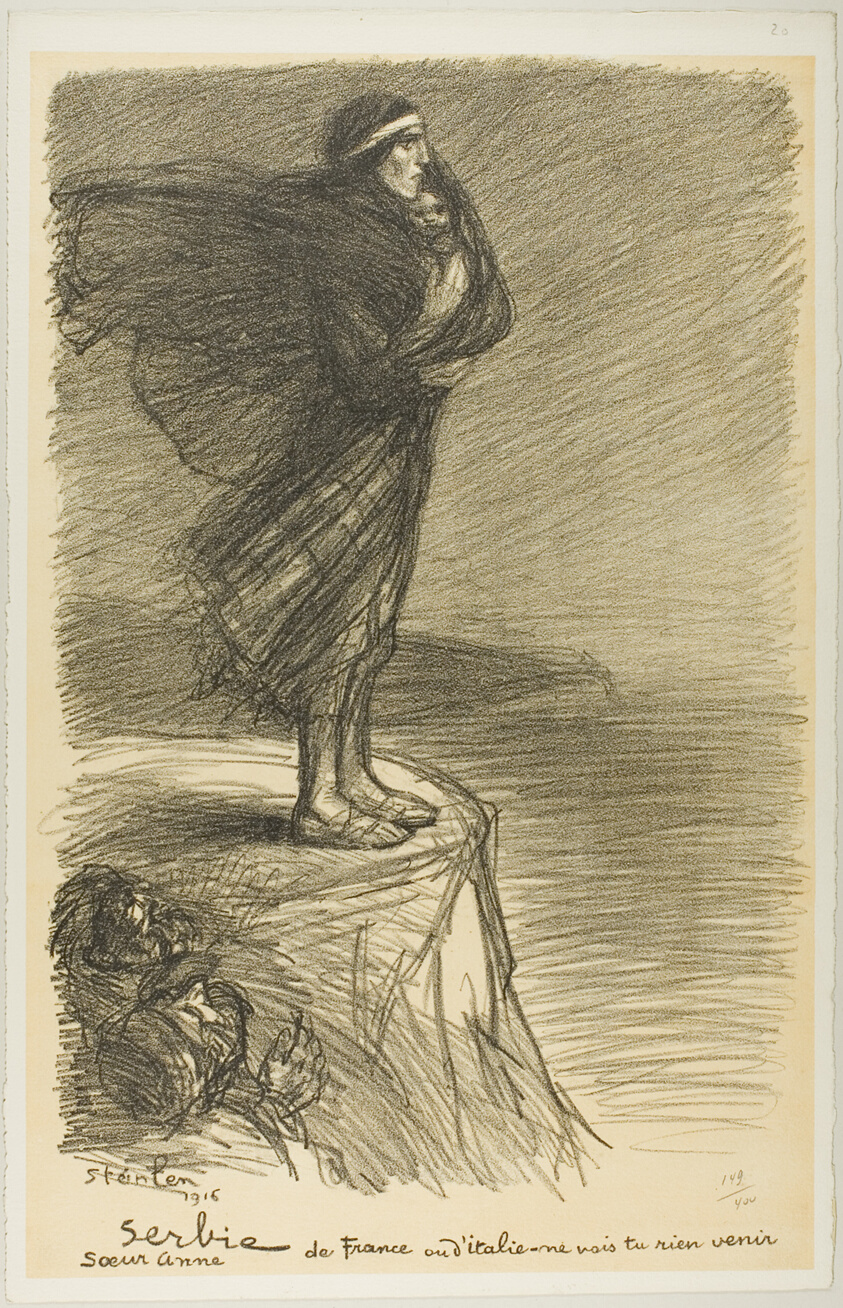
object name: Print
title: Serbia: Sister Anne, plate twenty from Actualités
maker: Théophile-Alexandre Steinlen; French, born Switzerland, 1859-1923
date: published January 1916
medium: Lithograph in black over fawn tint on thick off-white wove paper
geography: France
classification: lithograph; print; prints and drawing